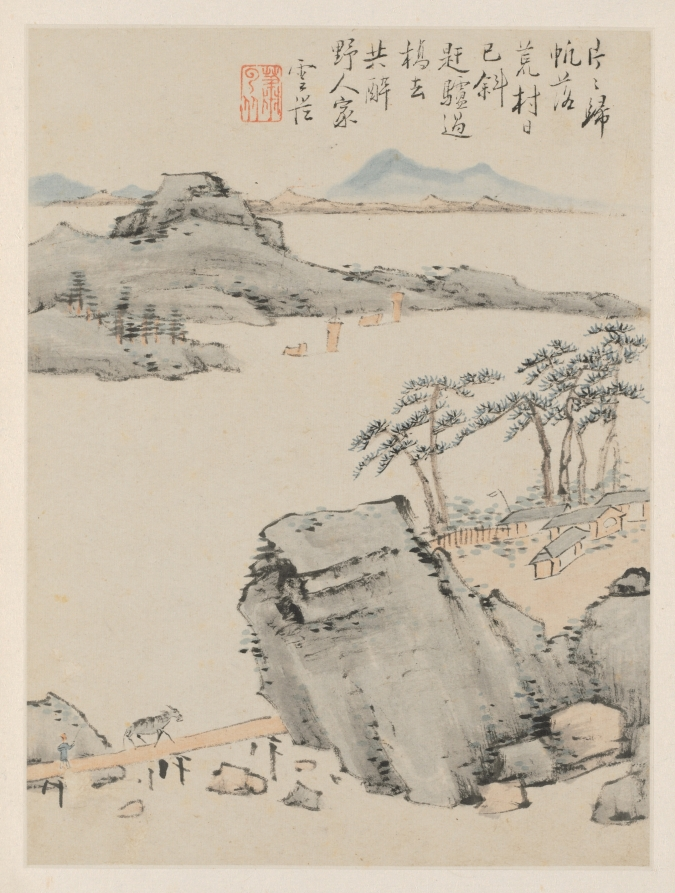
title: Album of Seasonal Landscapes, Leaf C (previous leaf 6)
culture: China, Qing dynasty (1644-1911)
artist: Xiao Yuncong (Chinese, 1596–1673)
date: 1668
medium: album leaf; ink and light color on paper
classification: Painting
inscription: Artist's inscription, signature, and 8 seals: Leaf F. Bit by bit, returning sails are lowered;/ In the deserted village the sun begins to set./ I lead my donkey across a bridge,/ I'll get drunk with friends at a country house. Yuncong [seal] Xiao Yuncong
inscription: 9 additional seals: 2 of Chen Yixi 陳奕禧 (1646-1709); 4 of Li Yufen 李玉棻 [Li Yunhu 李韵湖] (active mid-1800s); 3 unidentified.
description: Throughout his lifetime, Xiao Yuncong visited Nanjing and Yangzhou, cities embedded in the fertile and water-rich Jiangnan region, as reflected in his paintings. Xiao painted from nature, and his landscapes are informed by the seasons and his travels, as well as by his experience as a print designer. Xiao’s fresh, light colors continue to appear in later Shanghai school paintings. This album was formerly in the collection of Li Yufen in Yangzhou and then owned by Wu Hufan in Shanghai. While the artist impressed his seal consistently below his poetic inscriptions in the upper parts of the composition, the red seals on the margins and in the lower corners of the paintings are impressions by the album’s previous owners.